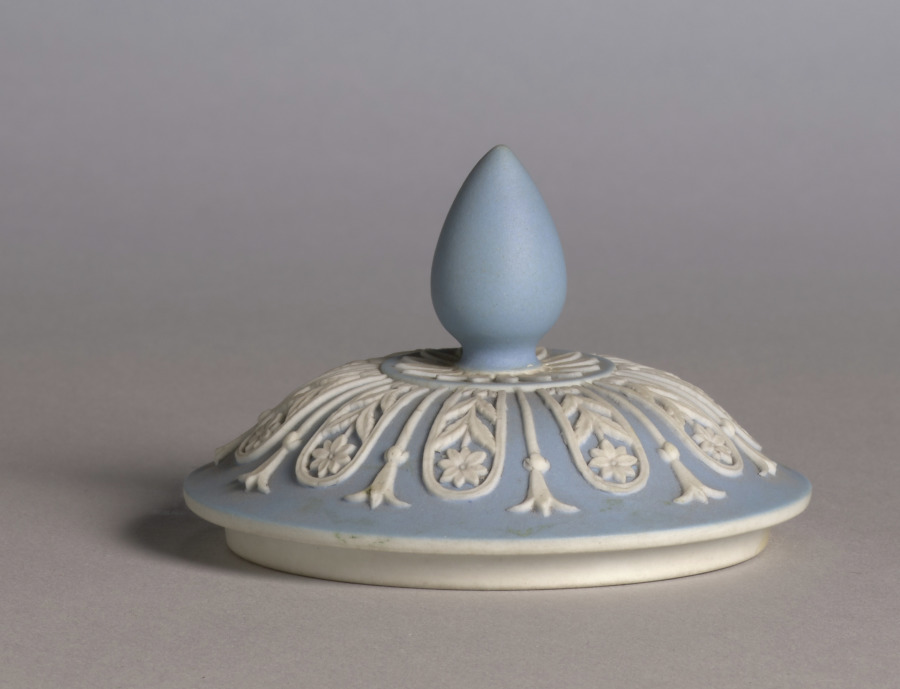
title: Cover for a Vase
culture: England, Staffordshire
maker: Josiah Wedgwood and Sons (British, Staffordshire, est. 1759)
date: c. 1850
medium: jasper ware with relief decoration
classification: Ceramic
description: Wedgwood's tricolor jasperware first became popular in the 1770s during a period of fascination with neoclassical decoration. This vase was probably made around 1850 during the period when this type of decoration was revived. The relief medallions depict two versions of the Greek god Apollo, the god of music, next to his harp or lyre.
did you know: See cover record.